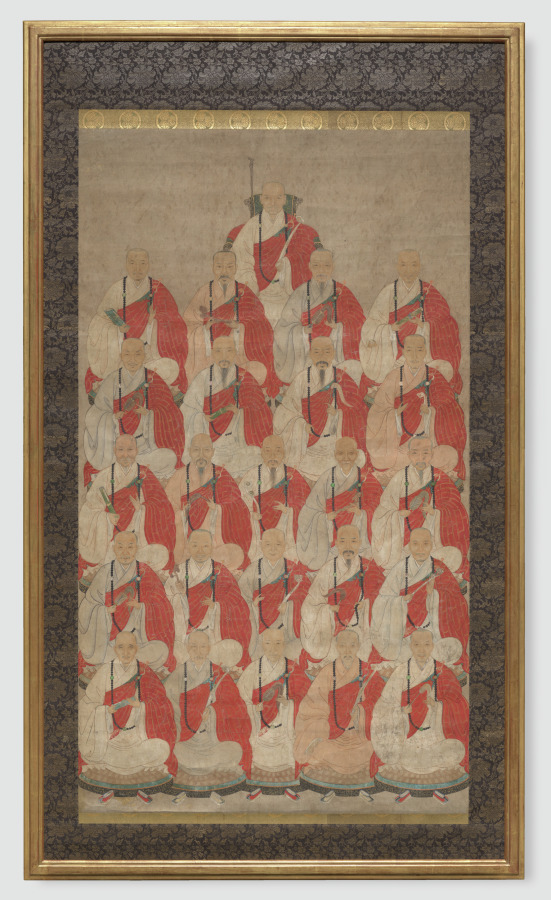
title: Lineage Portrait of Buddhist Monks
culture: China, Qing dynasty (1644–1911)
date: 1600s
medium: hanging scroll mounted on a panel (framed); ink, color, and gold on paper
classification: Painting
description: This painting features 24 Buddhist priests, likely of several generations and members of the same temple or school. The priests are depicted with attention to individual features and appearances, dressed in their formal garments. They may represent monks of the Ōbaku school, a form of Chan (Japanese: Zen) Buddhism founded in Japan by Chinese émigré monks and their Japanese followers.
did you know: The painting has remnants of a Japanese mounting, indicating that it was once kept in Japan.